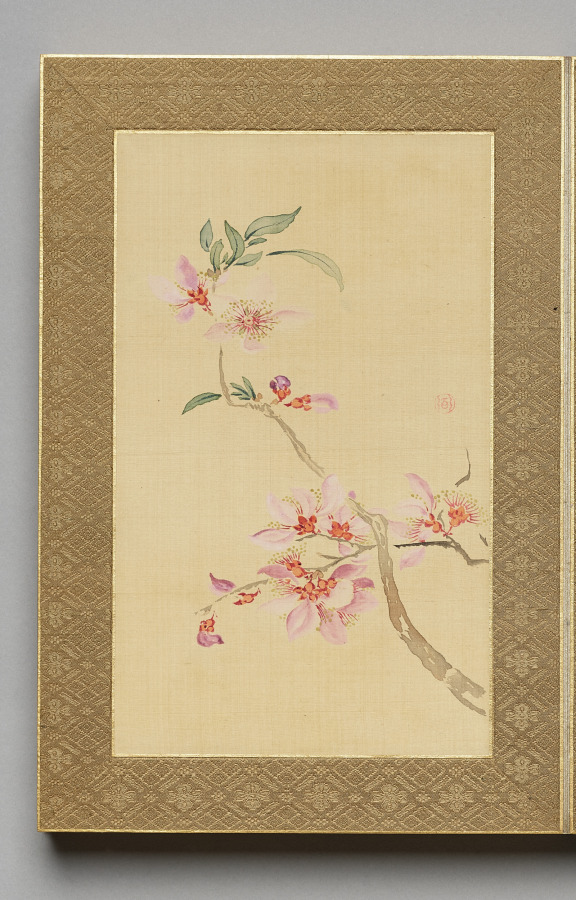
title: Preface from Flowers and Grasses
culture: Japan, Edo period (1615–1868)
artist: Tsubaki Chinzan (Japanese, 1801–1854)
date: 1841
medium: leaf from folding-album; ink on paper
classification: Painting